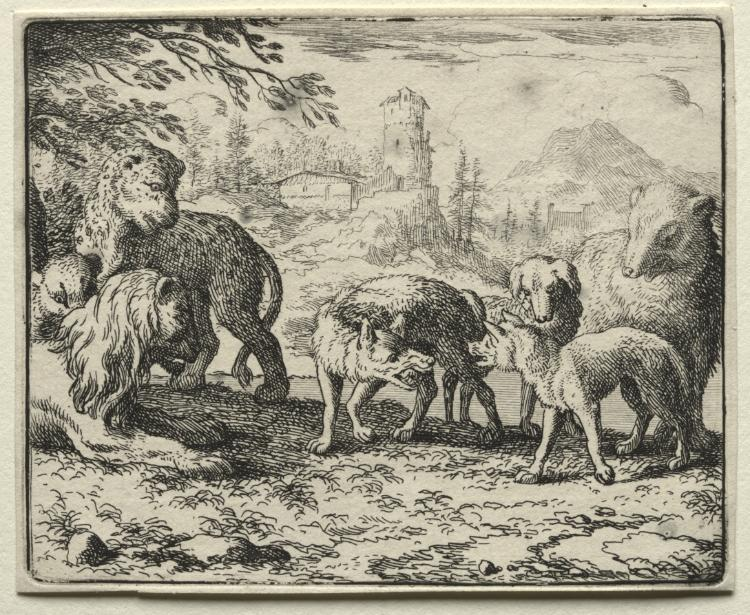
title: Reynard the Fox: The Condemnation of Reynard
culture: Netherlands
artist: Allart van Everdingen (Dutch, 1621–1675)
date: 1650–75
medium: etching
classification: Print